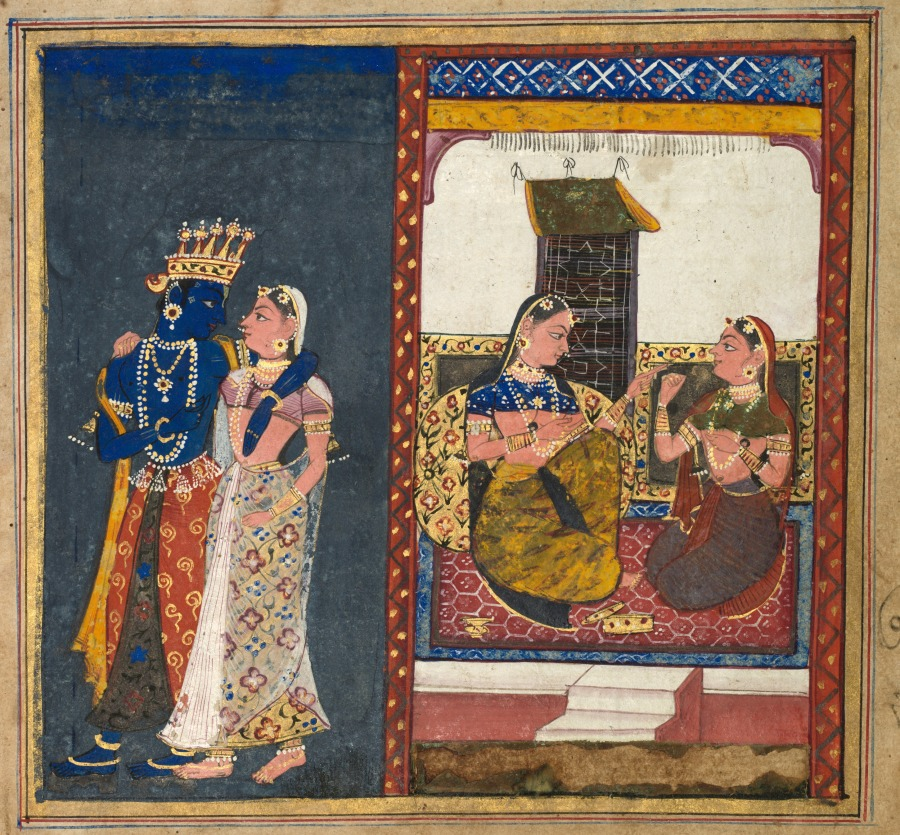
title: Radha and Krishna Embracing, Leaf from a Gita Govinda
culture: India, Deccan, Aurangabad (?), 17th century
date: c. 1650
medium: color and gold on paper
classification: Painting